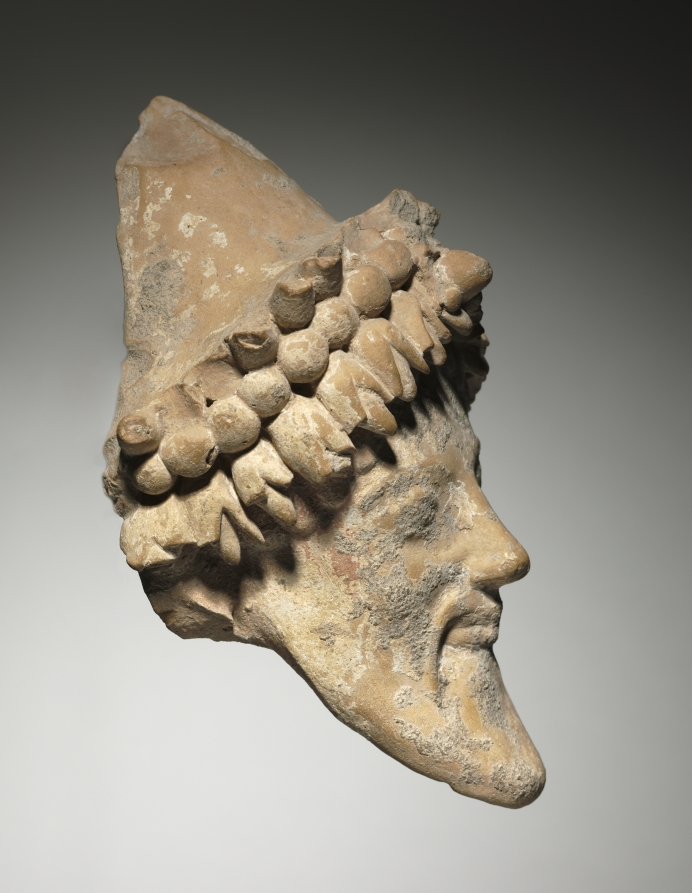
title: Head of Bearded Banqueter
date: 525–500 BCE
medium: terracotta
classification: Sculpture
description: This terracotta head of a man features wide, almond-shaped eyes and a serene smile beneath a long mustache. The man has a long beard and wears a wreath with leaves protruding above and below a string of fruit or beads. His head is covered by a pointed cap. This fragment probably belonged to a figure of a banqueter, or perhaps even Dionysos, the god of wine.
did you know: Wreaths were often worn during Greek symposia (banquets).